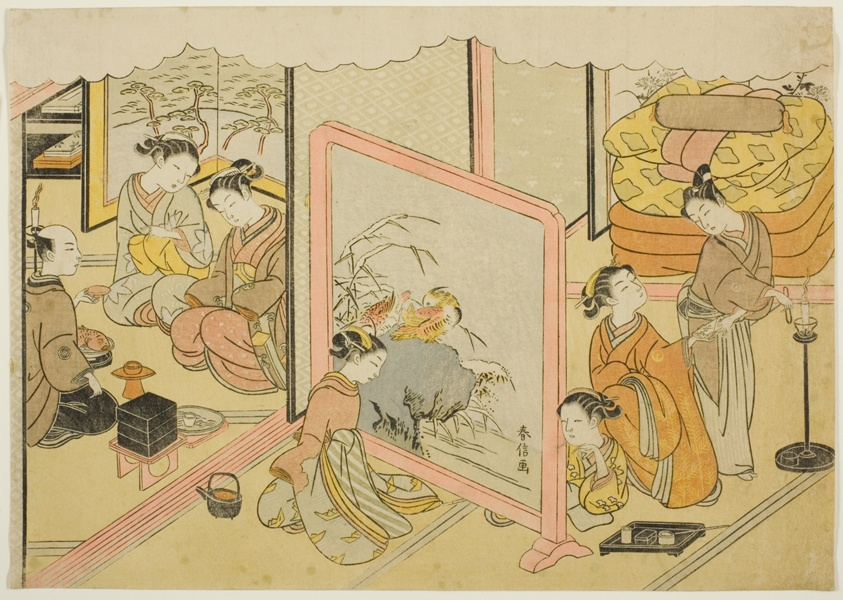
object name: Print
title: A Cup of Sake before Bed (Toko sakazuki), the sixth sheet of the series "Marriage in Brocade Prints, the Carriage of the Virtuous Woman (Konrei nishiki misao-guruma)"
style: Japanese (culture or style)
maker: Suzuki Harunobu 鈴木 春信; Japanese, 1725 (?)-1770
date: c. 1769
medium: Color woodblock print; chuban yoko-e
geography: Japan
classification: woodblock print; print; asian art